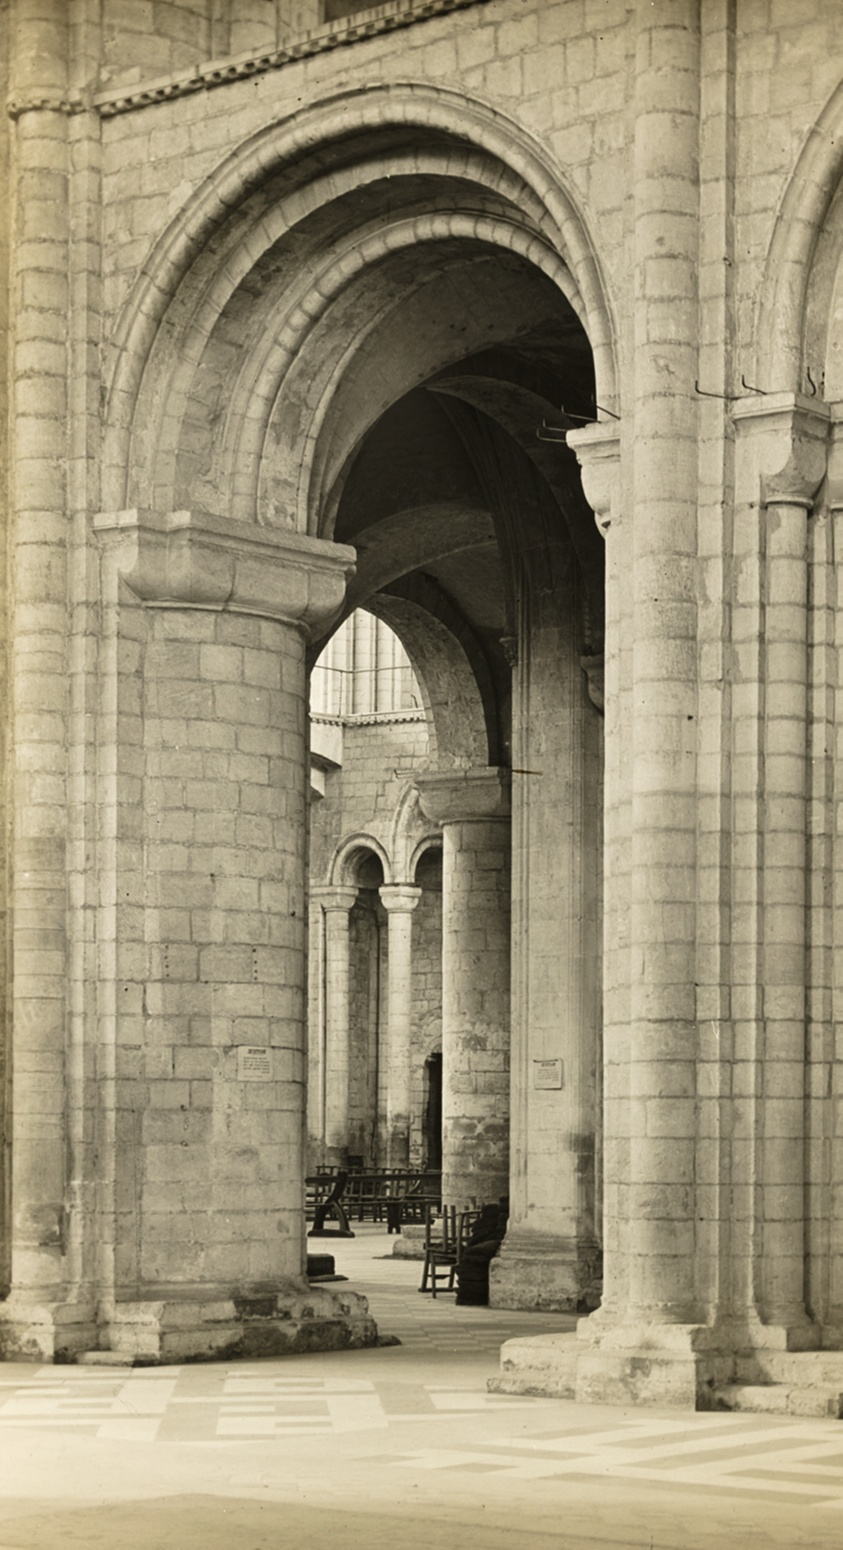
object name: Photograph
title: Ely Cathedral: Nave into North Transept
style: Pictorialism, 19th century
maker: Frederick H. Evans (English, 1853–1943)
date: 1891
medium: Lantern slide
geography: England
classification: photograph; photography